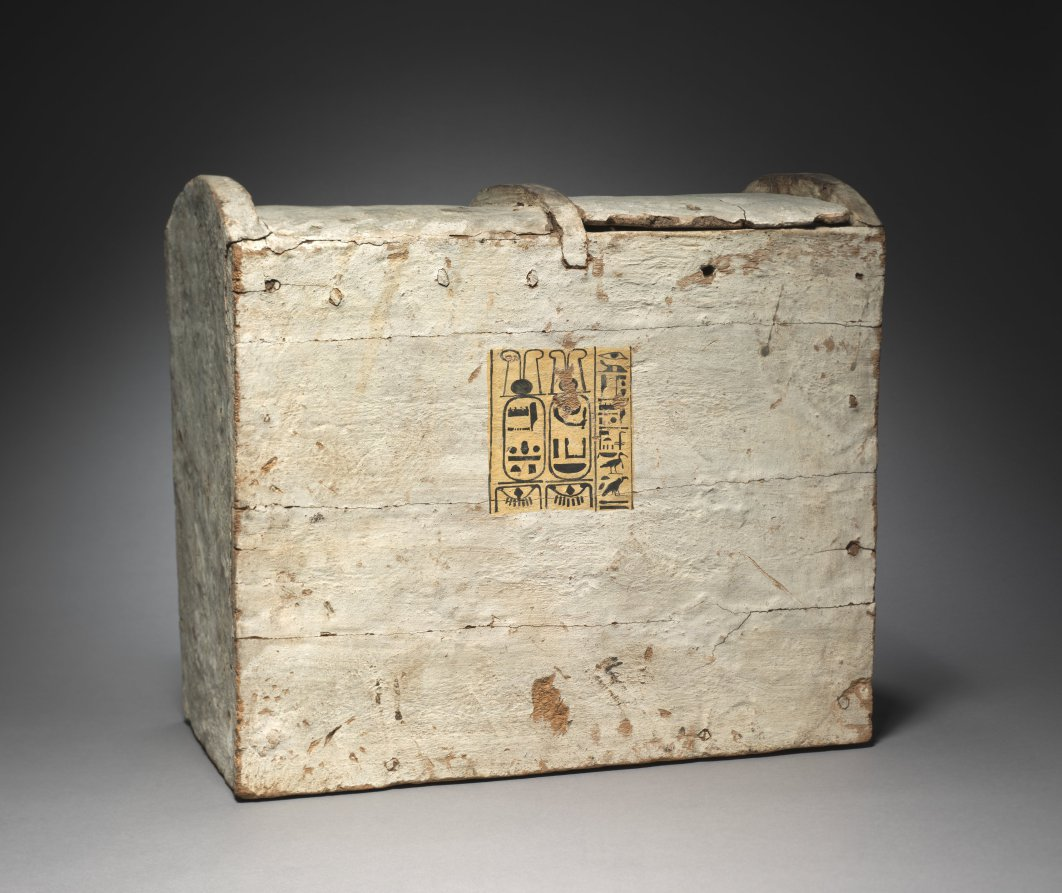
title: Shawabty Box of Bakenmut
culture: Egypt, Third Intermediate (1069–715 BCE), Dynasties 21–22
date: 1000–900 BCE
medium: gessoed and painted buckthorn wood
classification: Funerary Equipment